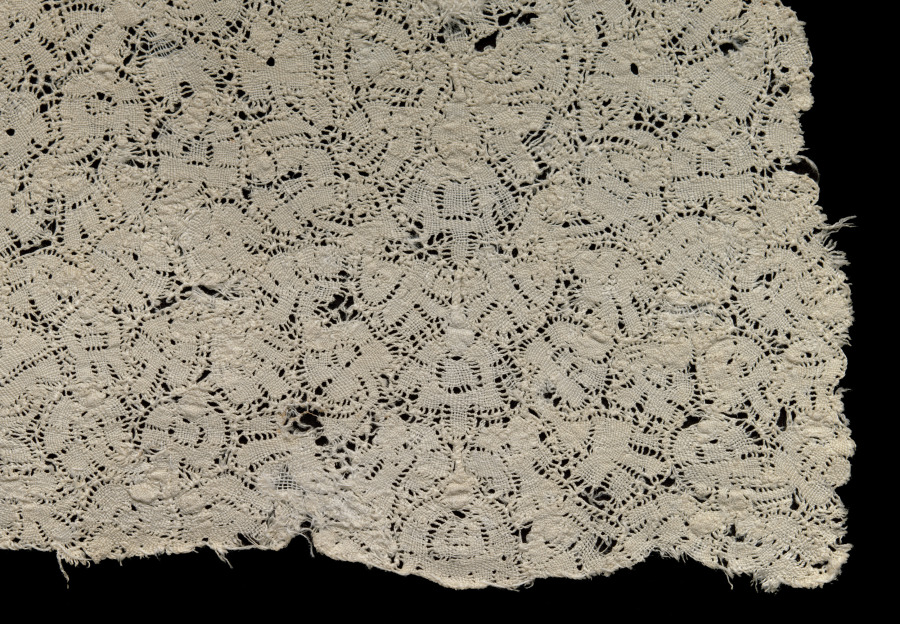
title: Lace Fragment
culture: Flanders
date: 1600–1620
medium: Linen; bobbin lace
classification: Lace